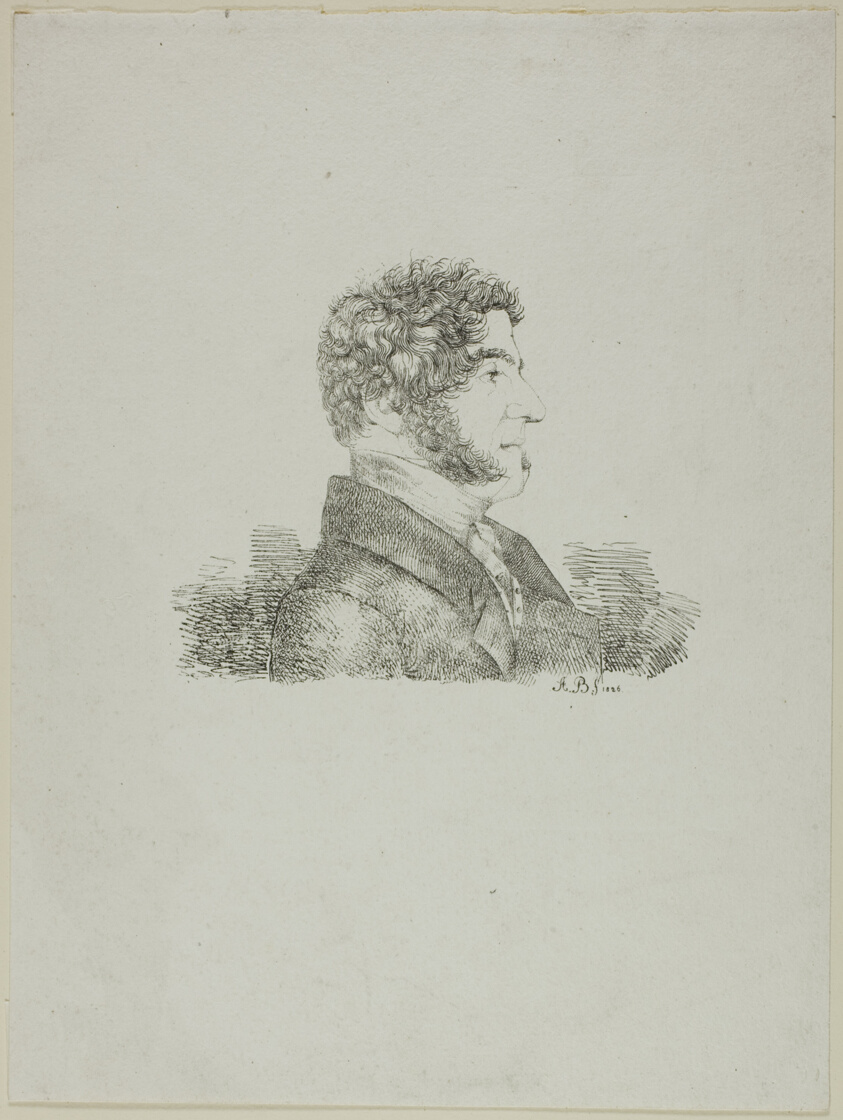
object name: Print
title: Portrait of a Man in Profile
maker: Monogrammist A.B. (probably French, 18th-19th century)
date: 1826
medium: Lithograph in black on ivory wove paper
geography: France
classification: lithograph; print; prints and drawing